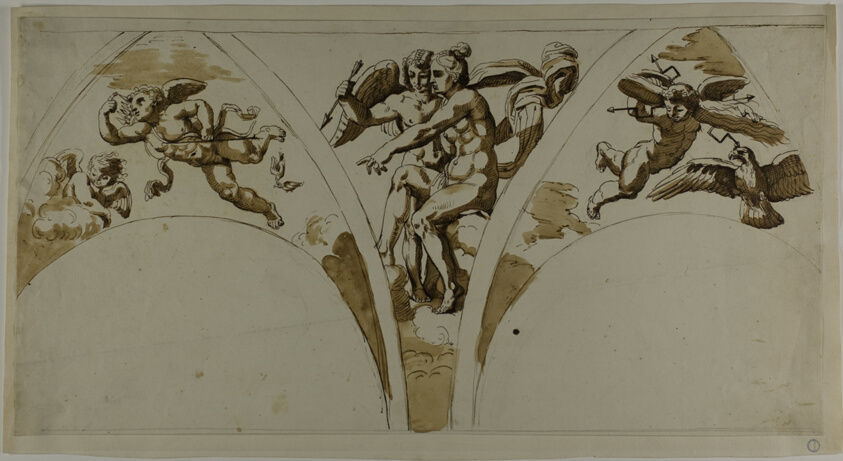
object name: Drawing and Watercolor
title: Venus Pointing out Psyche to Cupid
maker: after Raffaello Sanzio, called Raphael, and his workshop; Italian, 1483-1520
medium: Pen and brown ink, with brush and brown wash, over traces of black chalk, on ivory laid paper, tipped onto cream laid paper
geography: Italy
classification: ink with wash; drawings (visual works); prints and drawing